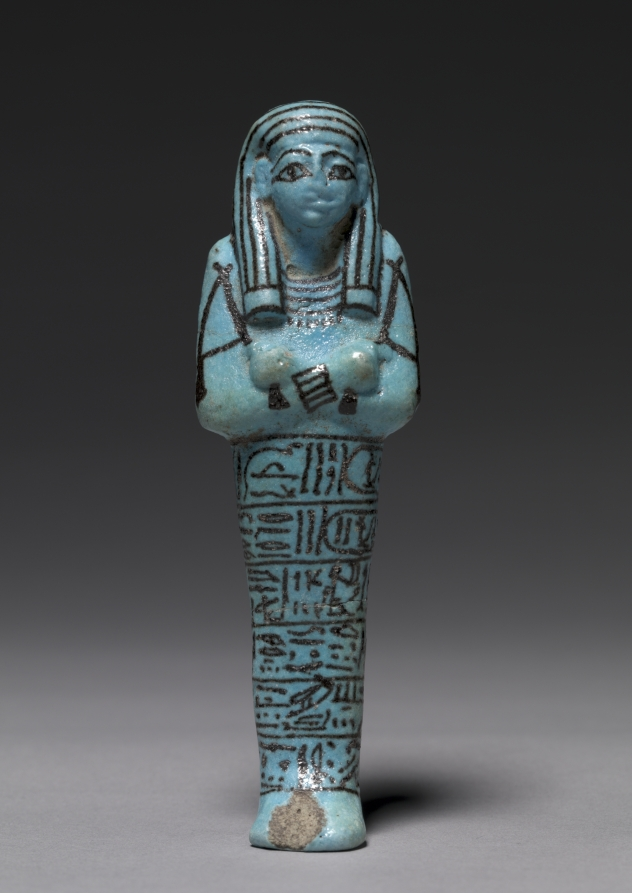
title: Shawabty of Seti I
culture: Egypt, Thebes, New Kingdom, Dynasty 19, reign of Seti 1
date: c. 1294–1279 BCE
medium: medium blue faience with black decoration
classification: Funerary Equipment